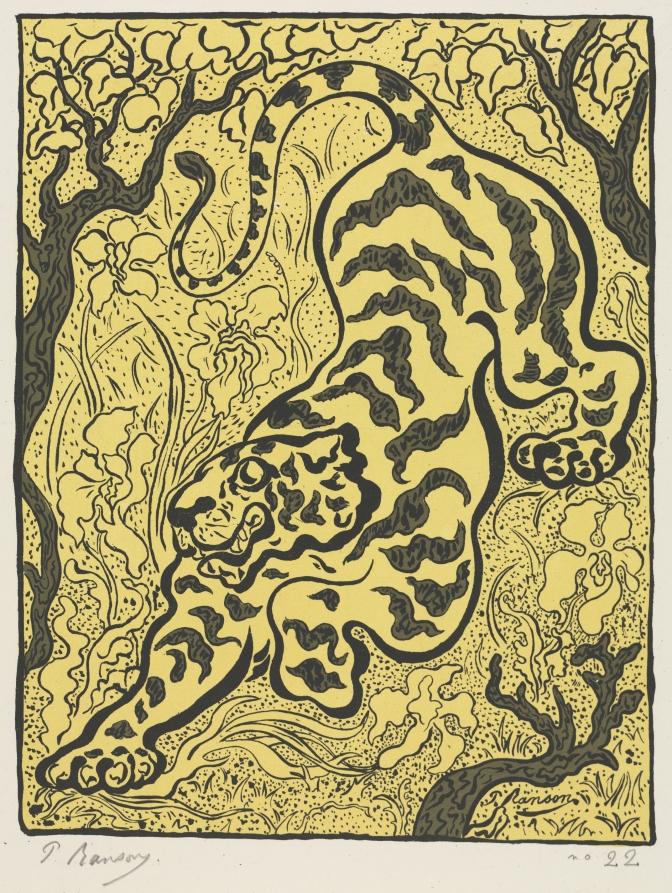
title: Tiger in the Jungle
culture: France, 19th century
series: L'Estampe Originale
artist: Paul Elie Ranson (French, 1862–1909)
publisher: Andre Marty (French, b. 1857)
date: 1893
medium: color lithograph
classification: Print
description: Paul Ranson used curving, wavelike forms to depict a stylized tiger in this lithograph. The artist was influenced by the calligraphic forms and heavy outlines that characterized Japanese prints, adopting these qualities in his own work. The print was created for L'Estampe Originale, a publication issued during the 1890s that presented a curated selection of original prints by contemporary artists to collectors.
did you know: Although it may look like the artist used colored paper, the bold yellow in this work is actually printed.